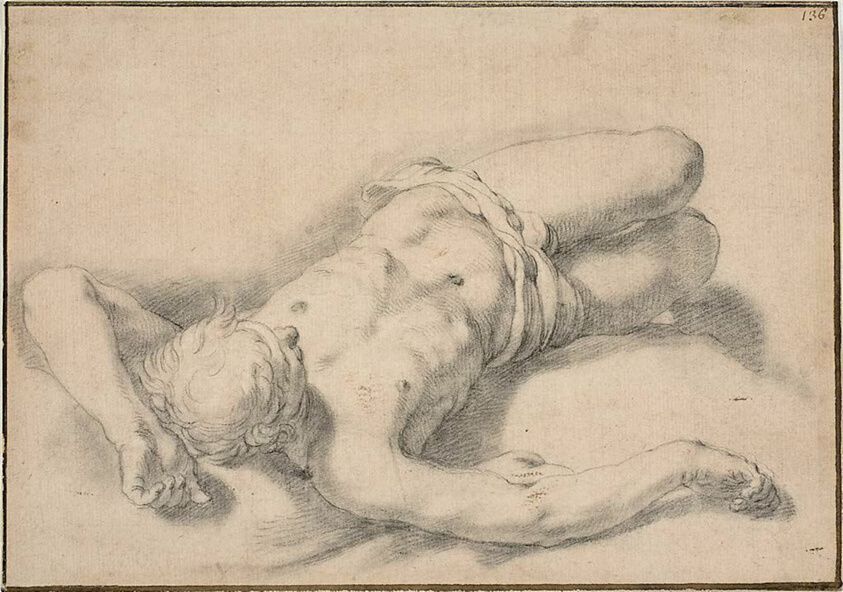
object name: Drawing and Watercolor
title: Study of a Nude Man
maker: Abraham Bloemaert (Dutch, 1566-1651)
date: 1645–51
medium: Black chalk on buff laid paper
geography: Holland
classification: chalk; drawings (visual works); prints and drawing